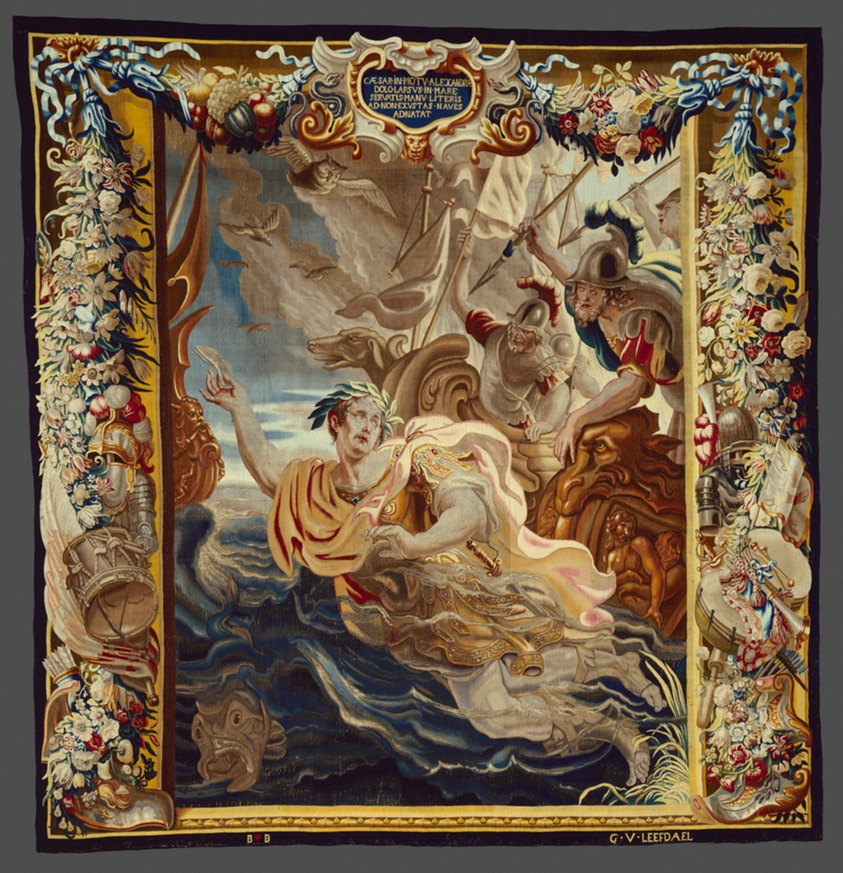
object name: Textile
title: Caesar Throws Himself into the Sea from The Story of Caesar and Cleopatra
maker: After a design by Justus van Egmont (Flemish, 1601–1674); Woven at the workshop of Willem van Leefdael (Flemish, 1632–1688); Brussels, Flanders (now Belgium)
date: c. 1680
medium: Wool and silk, slit and double interlocking tapestry weave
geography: Flanders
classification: weaving - tapestry; textile; tapestry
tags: soldiers, battles, swimming, armor, birds, boats, clouds, drums, feathers, fish, flowers, fruit, garlands, helmets, oceans, ribbon, sails, sealife, spears, swords, waves, cleopatra